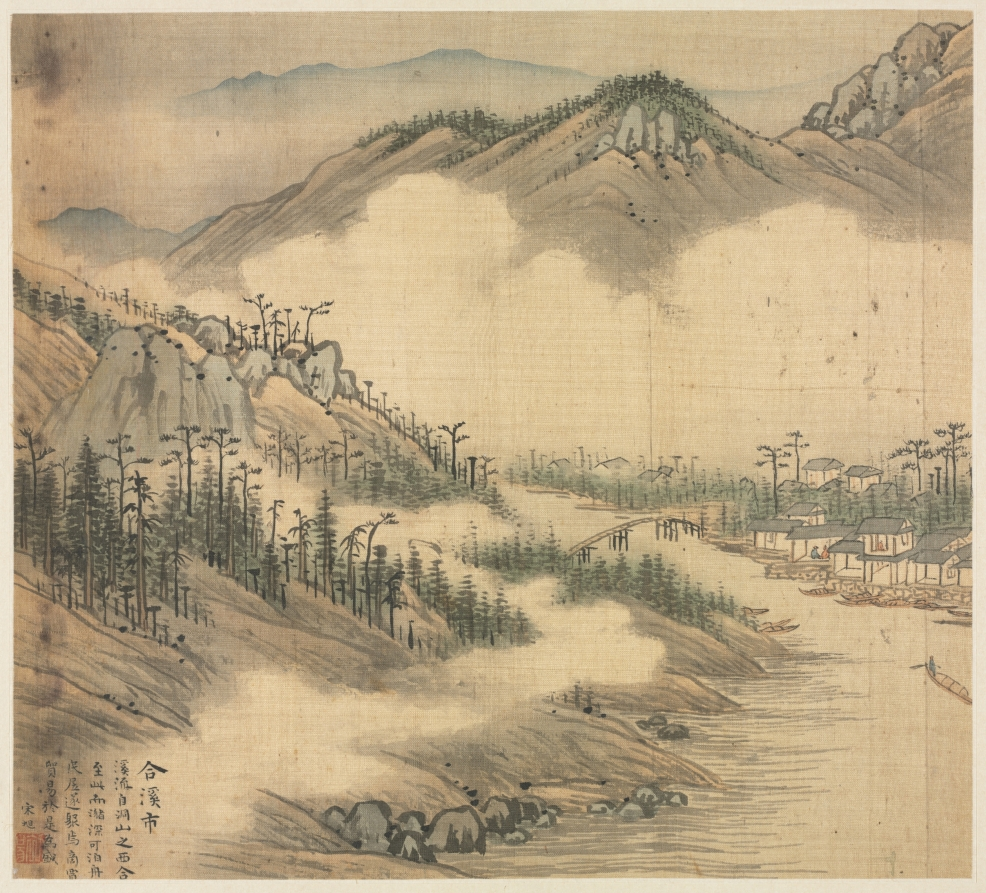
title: Hexi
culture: China, Jiaxing, Ming dynasty (1368–1644)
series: Eighteen Views of Huzhou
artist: Song Xu (Chinese, 1525-c. 1606)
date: c. 1588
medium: Album leaf; ink and color on silk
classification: Painting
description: By the 1500s, visits to historic and scenic sites in the lower Yangzi delta stimulated an increase of printed illustrated travel books. Topographical depictions of local scenery flourished. Leaves from this album illustrates sites around Lake Tai of the two adjacent counties Changxing and Wuxing (modern Huzhou). Song Xu, who lived intermittently in Jiaxing and Songjiang, must have passed through Wuxing by boat and thus knew the region. The paintings are inscribed with gazetteerlike notations, suggesting that the album was produced for clients as commemorative works, a travel guide, or for “armchair travel” (woyou) in one’s mind.